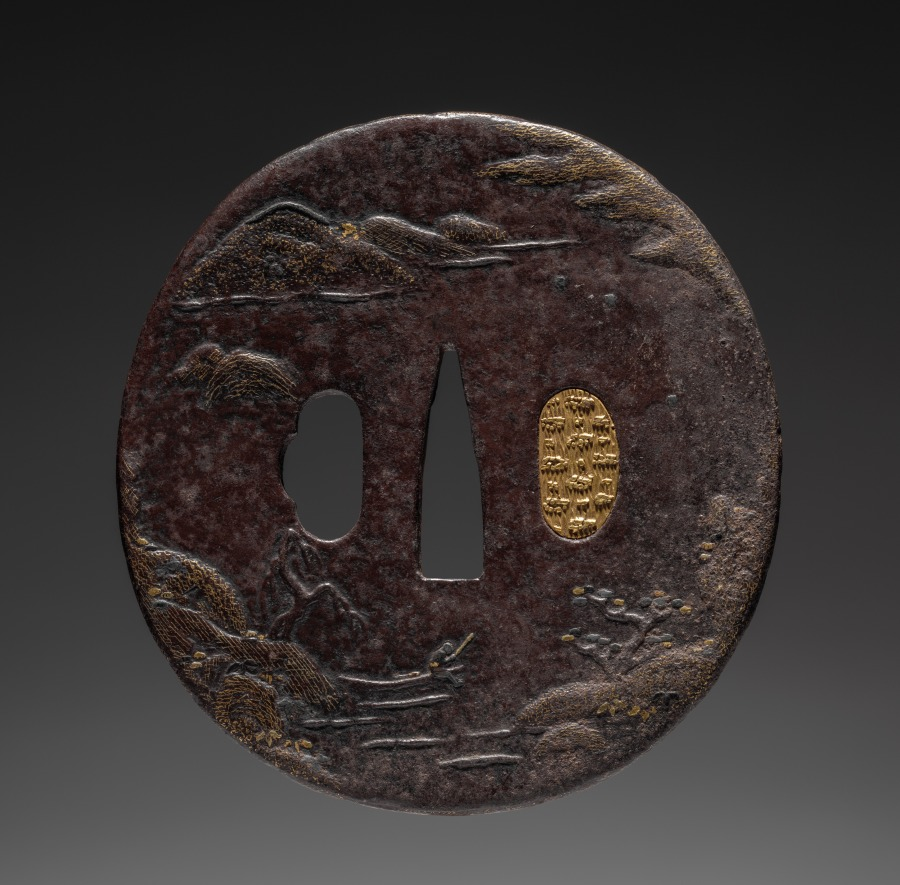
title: Sword Guard (Tsuba) with Chinese Landscape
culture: Japan, possibly Edo period (1615-1868)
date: c. 1615–1868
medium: iron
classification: Arms and Armor